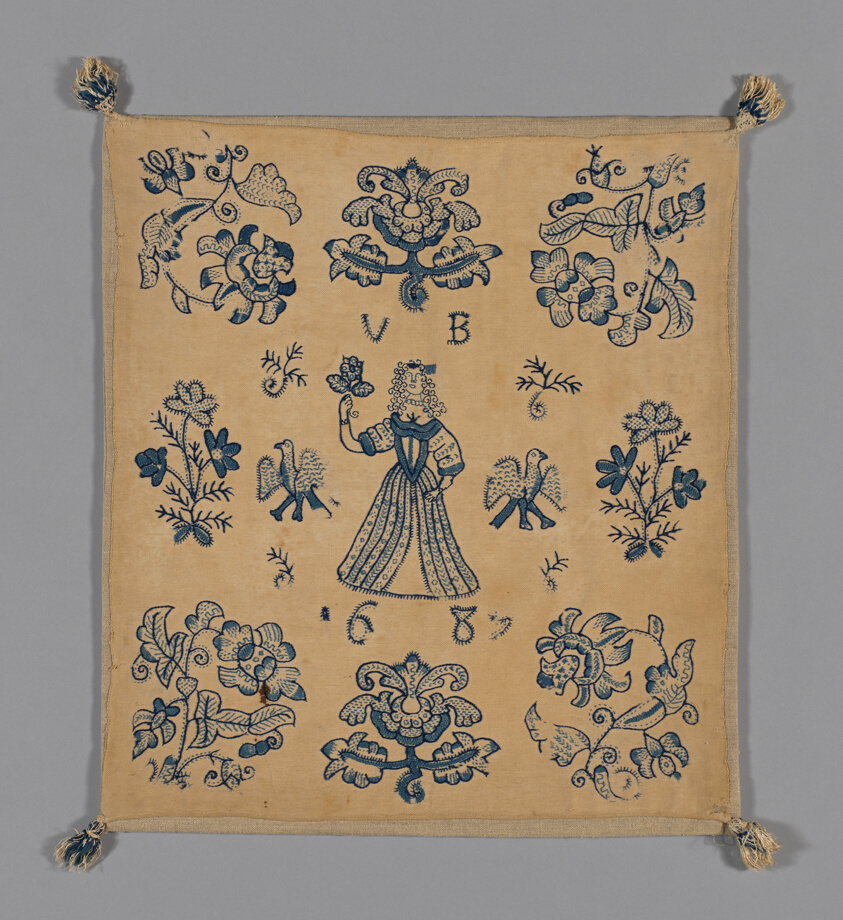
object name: Textile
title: Cushion Cover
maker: England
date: 1689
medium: Linen and cotton, weft-float faced twill weave; embroidered with wool yarns in arrowhead, back, buttonhole, herringbone, running, satin, sheaf filling, and stem stitches; wool tassels at corners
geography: England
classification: textile; needlework (visual works)